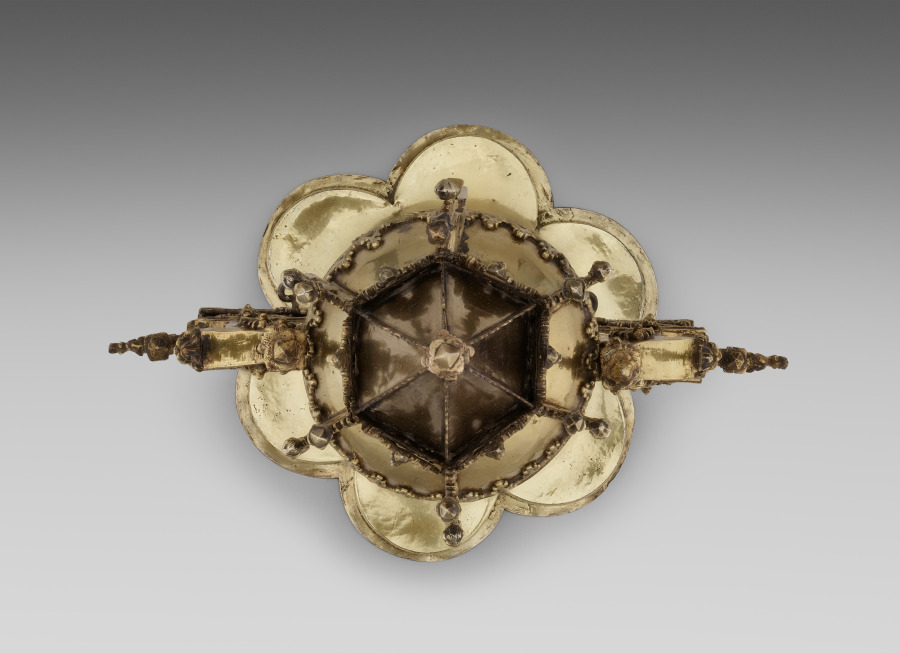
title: Monstrance with a Relic of Saint Sebastian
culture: Germany, Lower Saxony, Brunswick, Gothic period, 15th century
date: 1484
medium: gilded silver, rock crystal, bone, parchment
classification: Metalwork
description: This Late Gothic monstrance (from the Latin monstrare, "to show") is mentioned in the earliest inventory of Saint Blaise as "a large new monstrance containing relics of Saint Sebastian the martyr." Judging from surviving receipts, the reliquary was made by Werner Korff, a local goldsmith, who received payments for silver and gilding at the end of 1484. The reliquary was first displayed on the altar of the church of Saint Blaise in a solemn penitential mass on June 4, 1484, in an effort to ward off the plague. A recent examination revealed that the relic is a human metatarsal bone (one of five long bones of the human foot) and that its owner seemed to have suffered from periostitis, a medical condition that affects the connective tissue surrounding the bone.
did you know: In the Middle Ages, people suffering from diseases might make a journey, or pilgrimage, to venerate relics such as this one. The faithful believed that the remains of saints and holy people like Saint Sebastian could help those seeking aid such as relief from the plague.